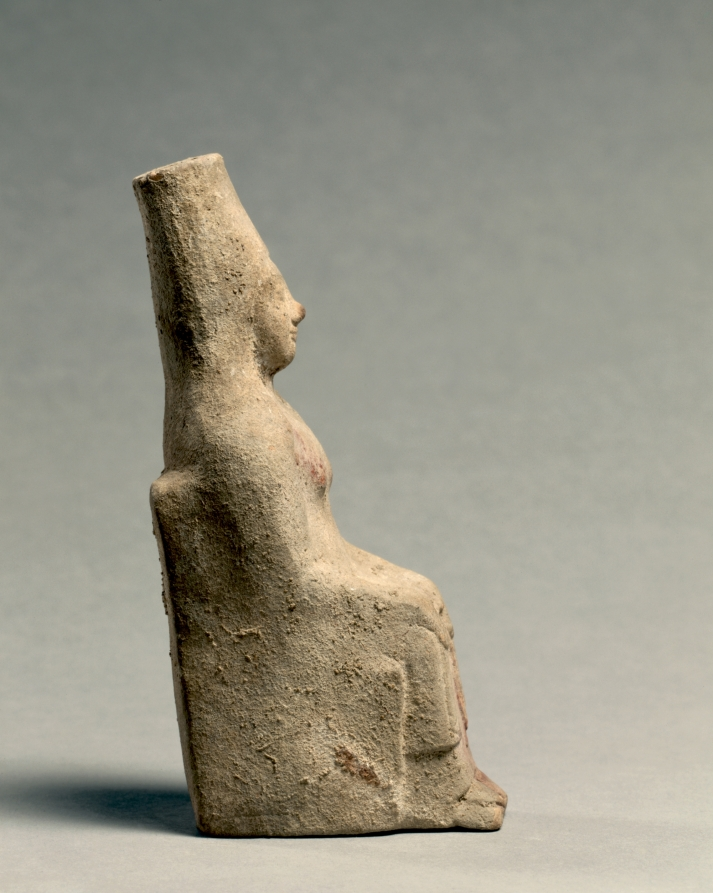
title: Seated Goddess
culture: Greece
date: 500s BCE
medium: terracotta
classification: Sculpture